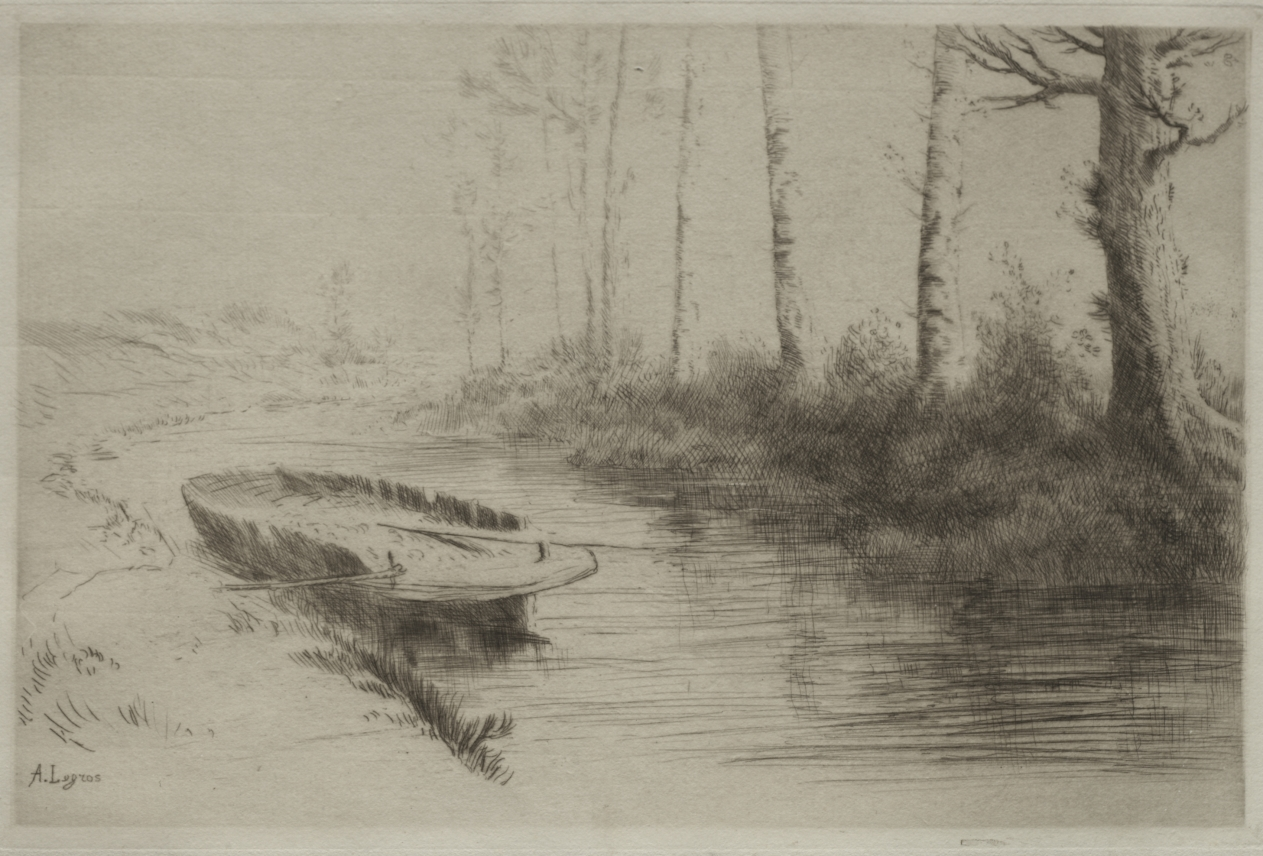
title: Le Canal: Effet du matin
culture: France, 19th-20th century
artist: Alphonse Legros (French, 1837–1911)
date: c. 1857–1911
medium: etching and drypoint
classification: Print